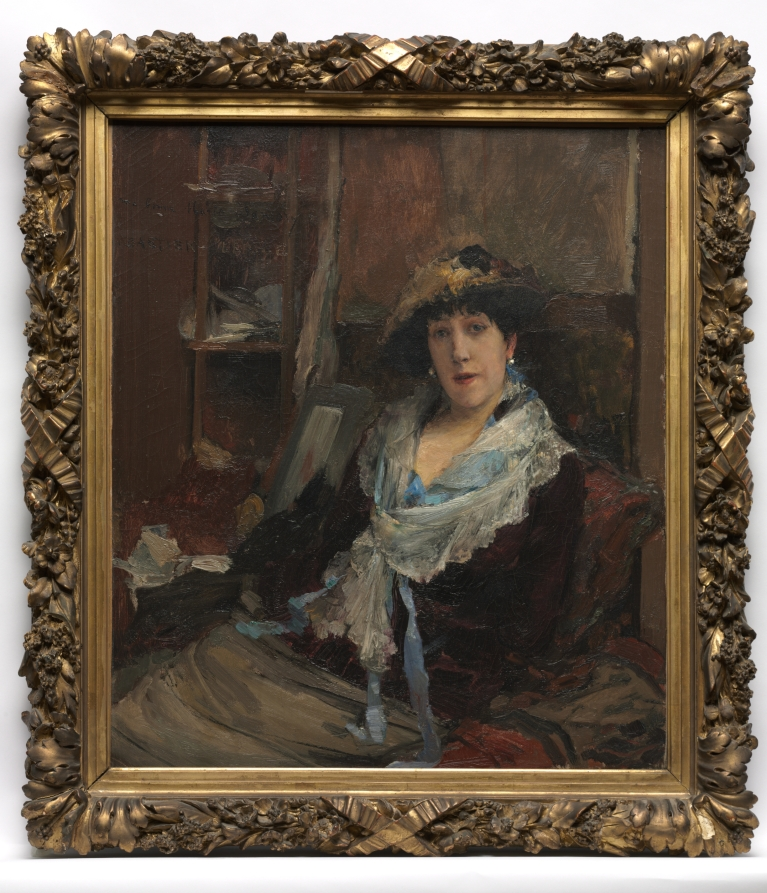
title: Marie Samary of the Odéon Theater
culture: France, 19th century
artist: Jules Bastien-Lepage (French, 1848–1884)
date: c. 1881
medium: oil on canvas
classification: Painting